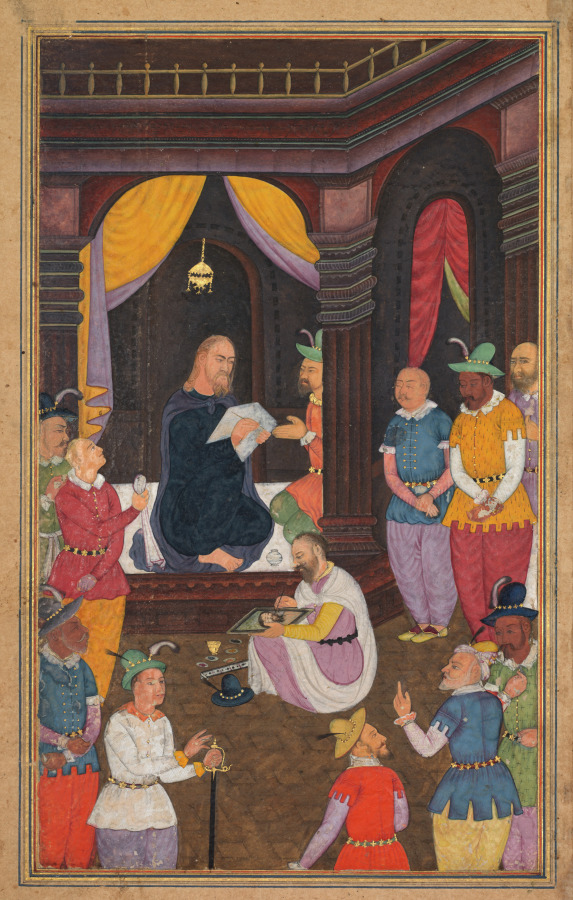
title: Jesus being portrayed by King Abgar’s painter (folio 143 recto), from a Mirror of Holiness (Mir’at al-quds) of Father Jerome Xavier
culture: Mughal India, Allahabad, made for Prince Salim (1569–1627)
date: 1602–4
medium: Gum tempera, ink, color, and gold on paper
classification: Manuscript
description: Jesus sits under a golden lamp with a cloth in his hand, while an artist sits before him, struggling to paint his portrait. The artist had been sent by his king, Abgar of Edessa, who was ill and believed the portrait would cure him. Jesus pitied the artist and pressed his face to the cloth to create a perfect impression. The miraculous cloth became known as the Mandylion and was venerated by Christians as a relic of Christ. The similarity between the names Abgar and Akbar suggests that Father Jerome included this noncanonical story in his biography of Jesus to resonate with and inspire the Mughal emperor.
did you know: Artist’s pigments are arranged in shells next to the brass cup for water.